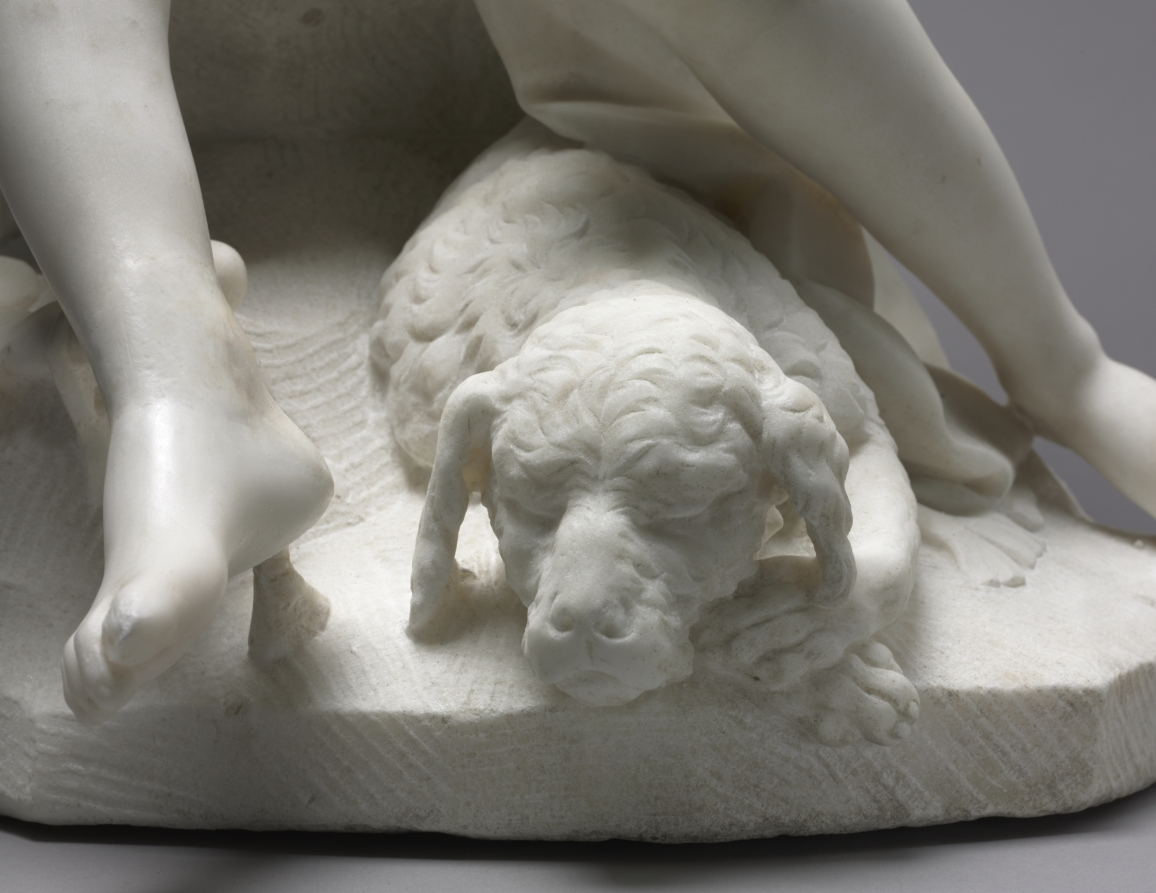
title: Sleeping Endymion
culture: Italy, 18th century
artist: Agostino Cornacchini (Italian, 1686–1754)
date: 1716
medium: marble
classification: Sculpture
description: Cornacchini moved away from the dramatic movement and light effects characteristic of baroque sculpture toward a calmer, gentler, more graceful style favored by 18th-century taste. This sculpture depicts Endymion, a beautiful young shepherd from Greek mythology. His beauty so entranced Selene, the personification of the moon, that she asked Zeus to grant Endymion immortality. Zeus did so, but only after placing Endymion in an eternal sleep.